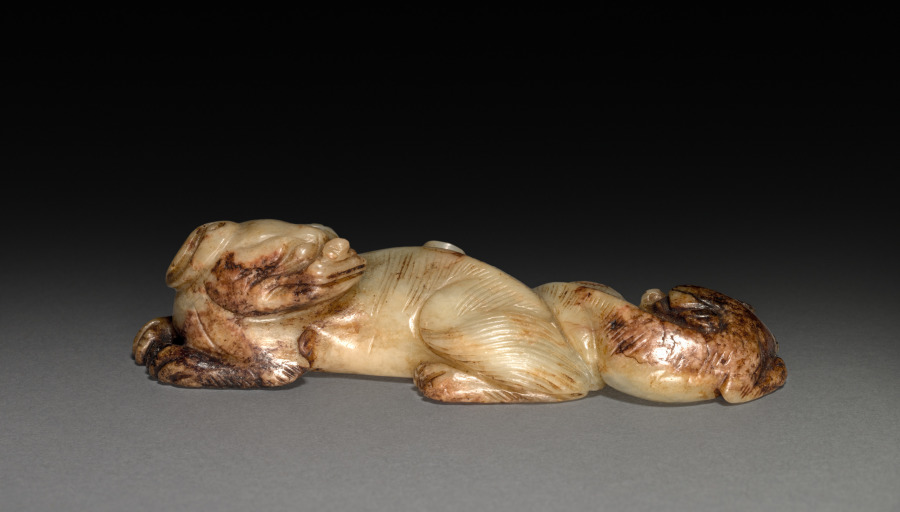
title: Reclining Dog and Puppy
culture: China, Yuan dynasty (1271-1368)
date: 1271–1368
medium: jade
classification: Jade